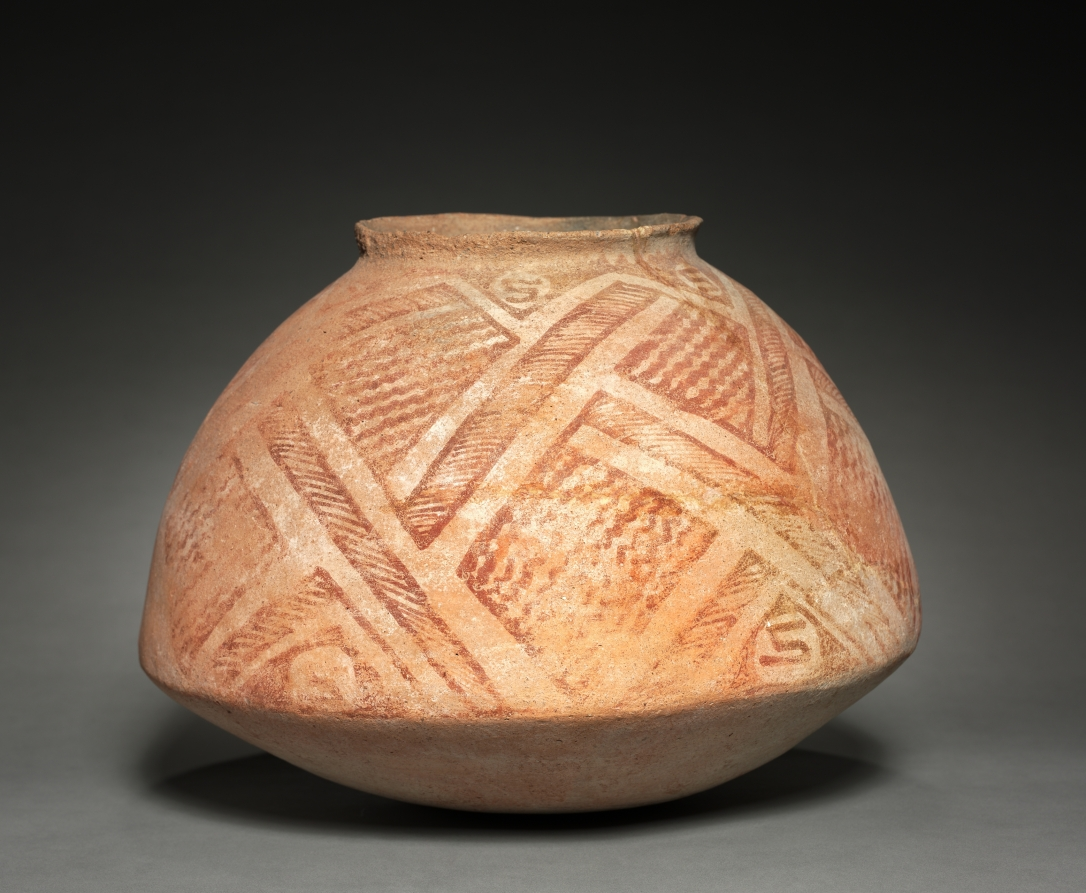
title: Large Storage Jar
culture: Southwest, Arizona, Hohokam, 10th-11th century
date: c. 900–1100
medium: Ceramic, slip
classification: Ceramic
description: The Hohokam Arizona were accomplished agriculturalists whose decline after 1350 was caused partially by drought, and then flooding that overcame irrigation canals. Many Hohokam settlements boasted large public structures including platform mounds and oval ballcourts. The latter reveal contact with Mexico, where the ballgame was a long-established tradition.